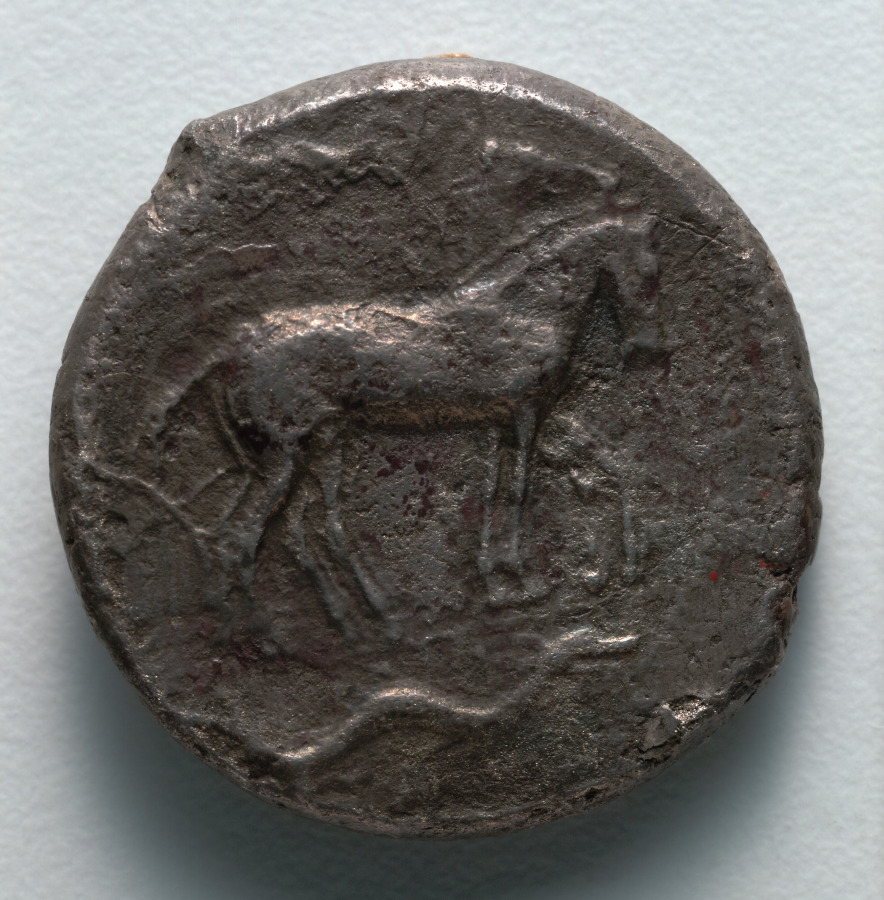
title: Tetradrachm: Quadriga, Nike, Ketos (obverse)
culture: Greek, minted at Syracuse (Sicily)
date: c. 467–440 BCE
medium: silver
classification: Coins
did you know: Three dolphins and a bit of a fourth are still visible swimming clockwise around Arethousa.